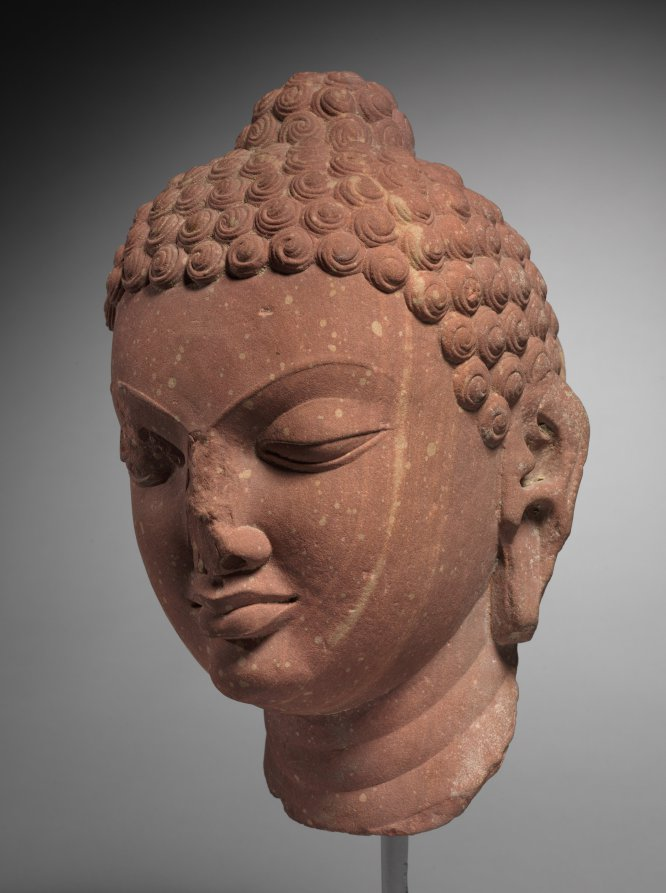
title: Head of Buddha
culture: Northern India, Uttar Pradesh, Mathura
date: 400s CE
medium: sandstone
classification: Sculpture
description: The brows arch with tension and alertness, though the lids are half closed. Short curls cover his head and cranial protuberance, which during this period came to be interpreted as a mark of one who has reached enlightenment, his state of awareness having surpassed the boundaries of an ordinary human being. Sculptors working during the time when kings of the Gupta dynasty (c. 319–550 CE) ruled northern India achieved a balance between fleshy volumes and idealized linear features. This balance led scholars to consider the Gupta period to be a “classical” age of Indian art.